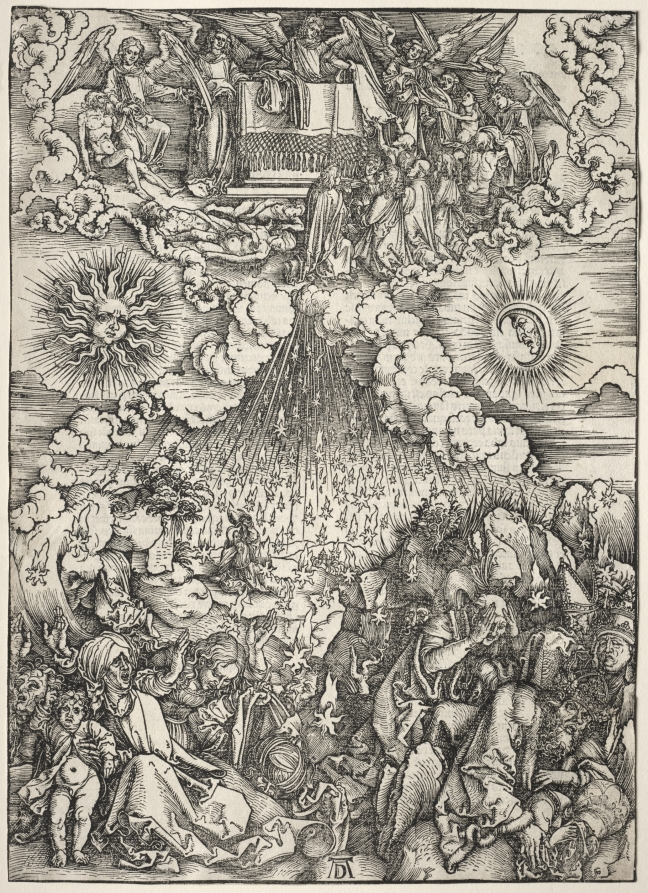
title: Revelation of St. John: Opening of the Sixth Seal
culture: Germany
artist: Albrecht Dürer (German, 1471–1528)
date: 1511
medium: woodcut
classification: Print